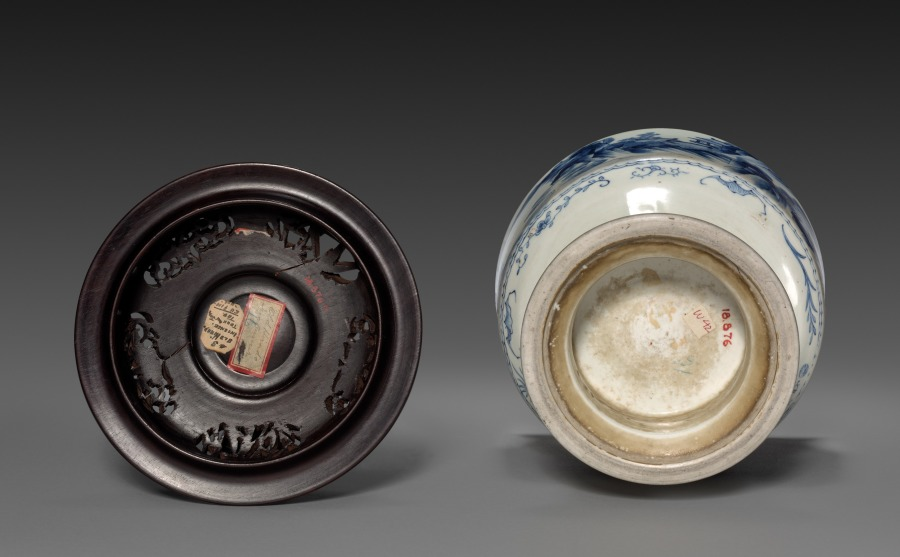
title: Jar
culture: Japan, Edo period (1615–1868)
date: early to mid-1800s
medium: porcelain with underglaze blue; teak and carved stone (lid)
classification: Ceramic